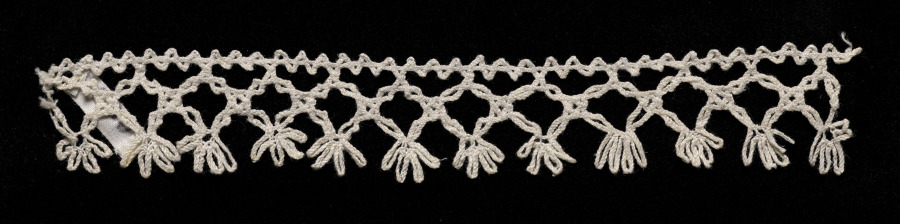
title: Lace Edging of Points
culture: Italy, Venice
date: 1540–60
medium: Bobbin lace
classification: Lace